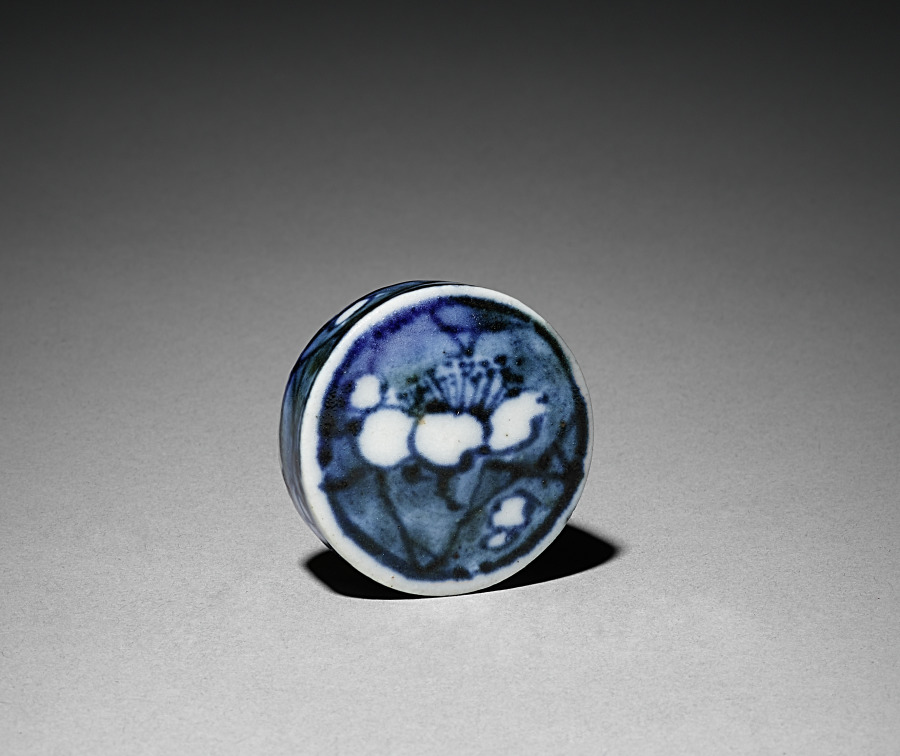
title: Tea Container (lid) with Plum Blossoms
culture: Japan, Edo period (1615–1868)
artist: Aoki Mokubei (Japanese, 1767–1833)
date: early 1800s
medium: porcelain with underglaze blue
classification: Ceramic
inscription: signed "Ro Mokubei" on base in underglaze blue.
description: Aoki Mokubei, born into a family of restaurateurs, was a potter, calligrapher, painter, and scholar, and is considered one of the three masters of later Edo period Kyoto ceramics. He specialized in porcelains fashioned after Chinese prototypes, and created works for steeped tea (sencha) such as these matching tea caddies decorated in an underglaze blue called sometsuke—literally “with applied dye.” He signed them on their bottoms. They also have intricately patterned silk sleeves to both beautify and protect them. On the exterior of the lid of the outer wooden box that contains them, it is written that Mokubei inscribed and painted an image on the box. On the interior of the lid, the signature and seals of a former owner are written. Mokubei has signed the lid of the inner box, and a charming ink and light color composition of West Lake in Hangzhou in China covers its three sides. On the fourth side is a long inscription by Mokubei describing the scene.